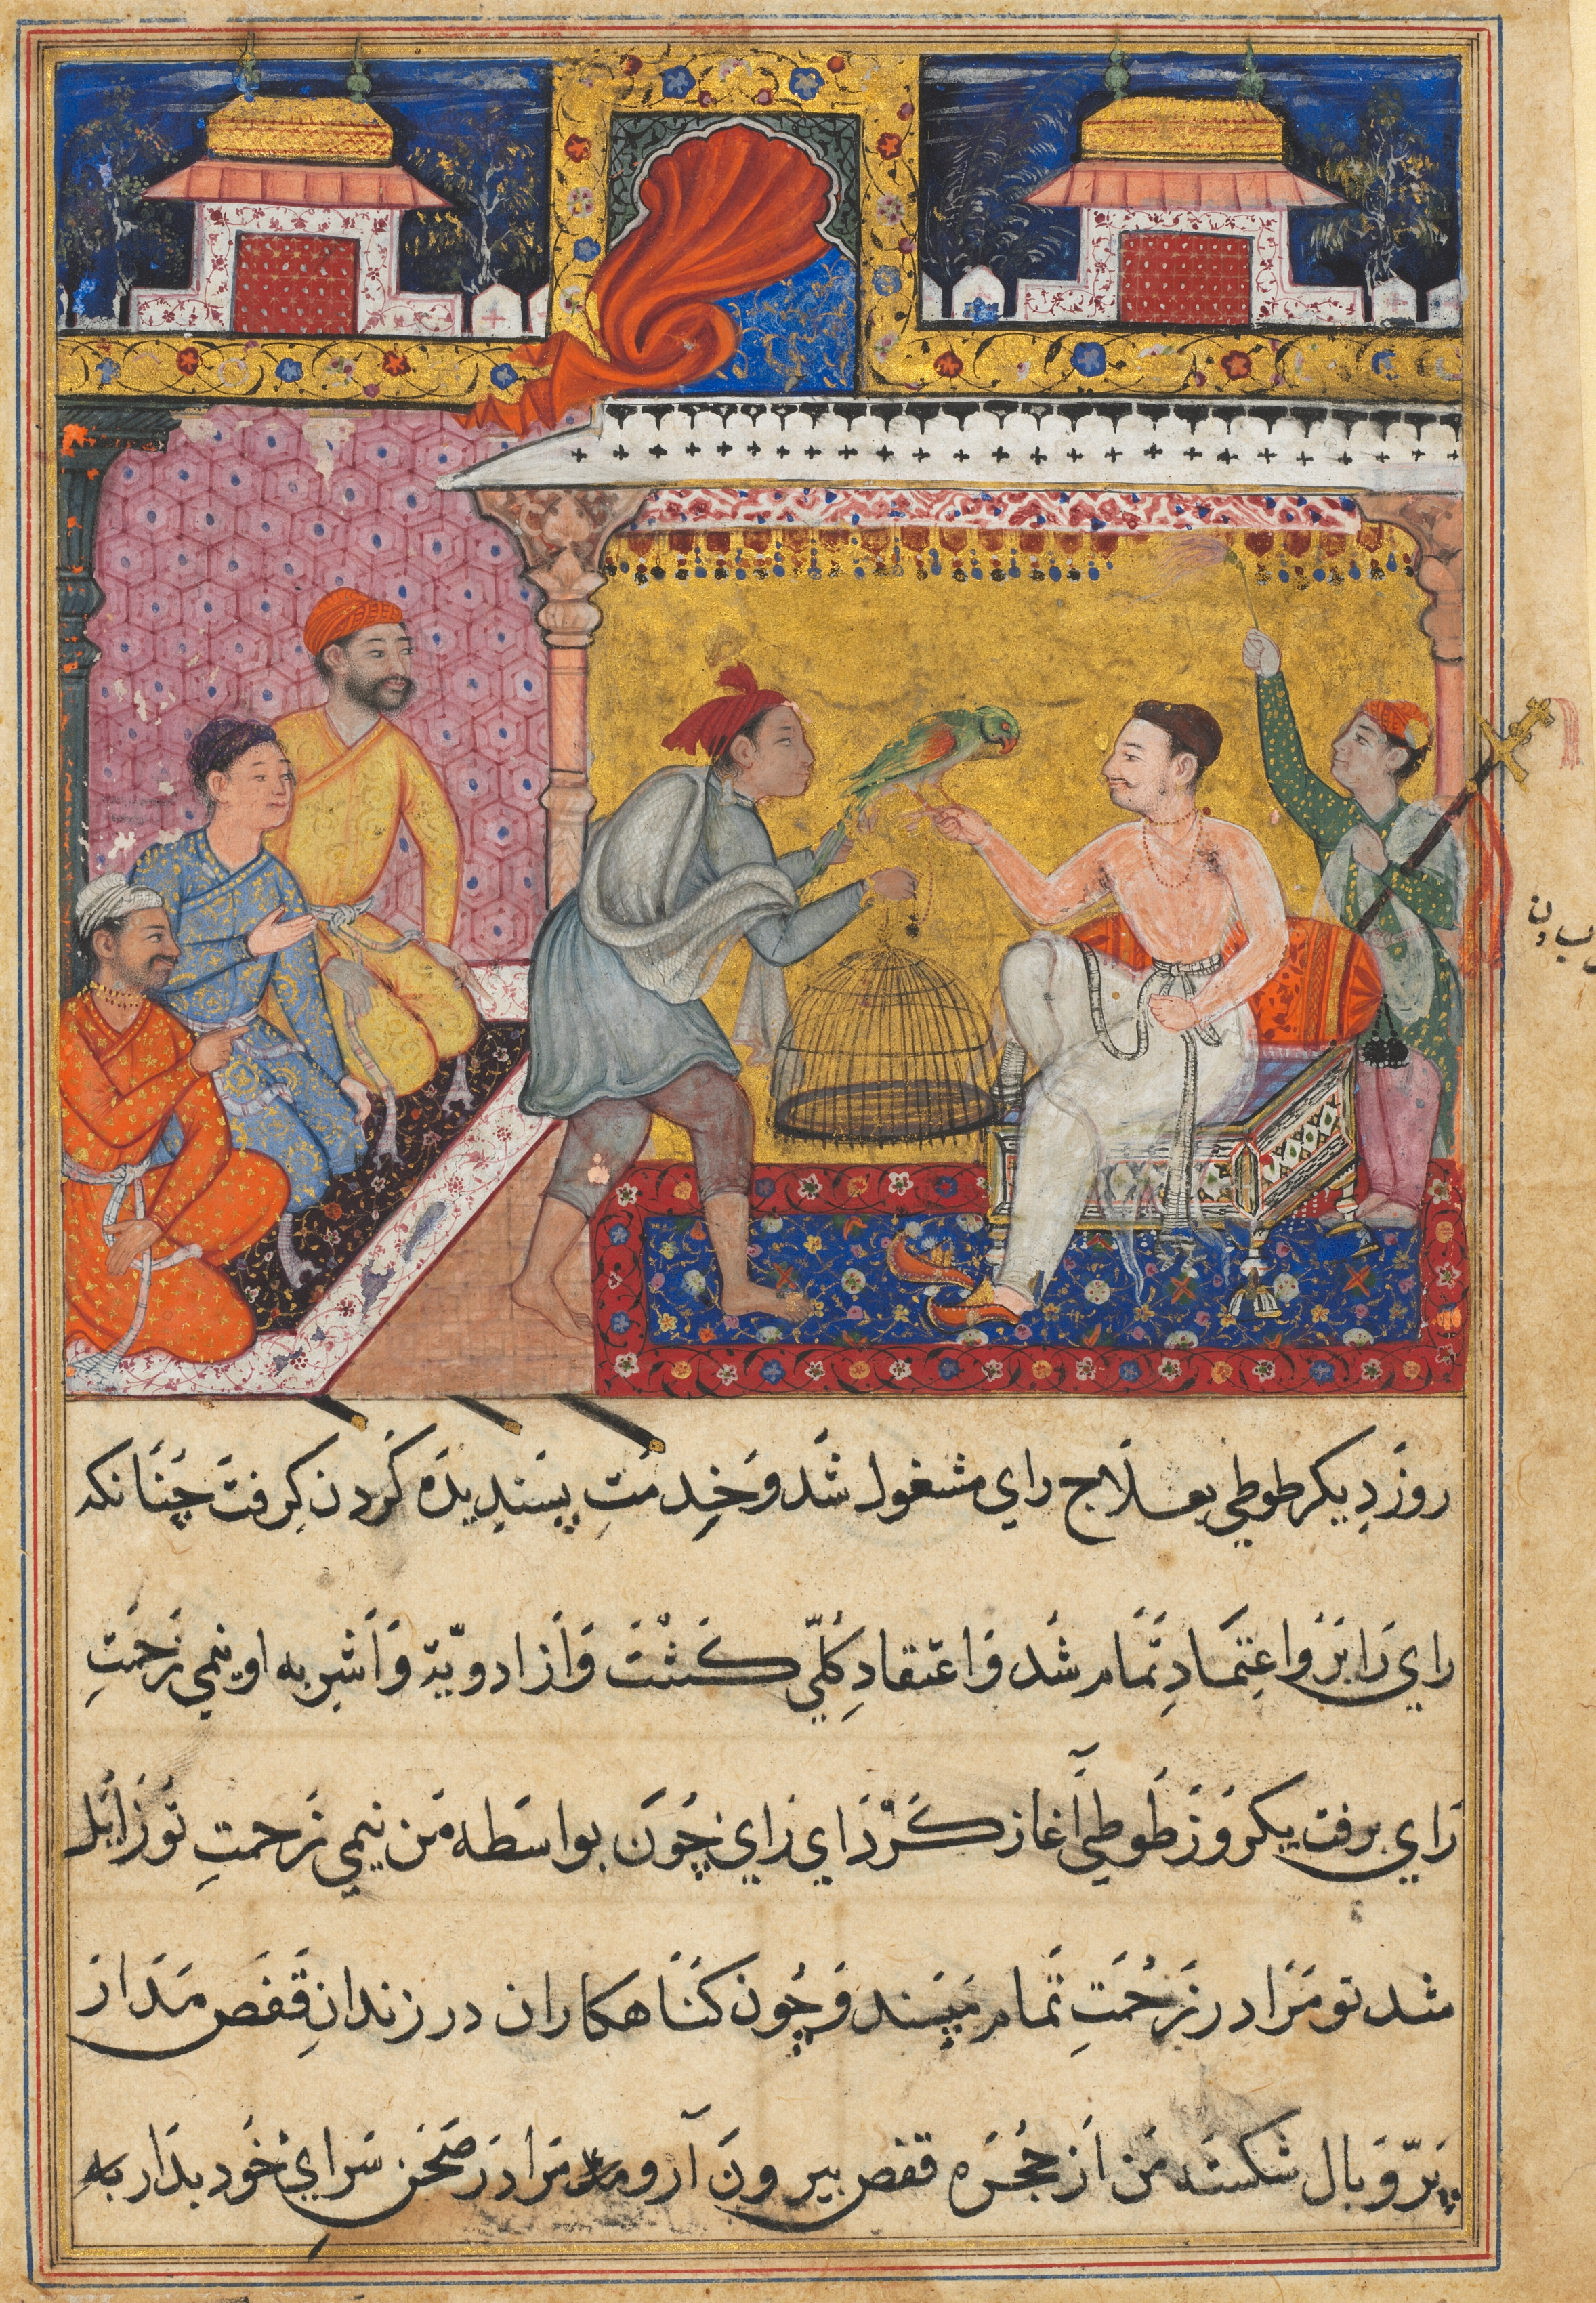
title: Page from Tales of a Parrot (Tuti-nama): text page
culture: Mughal India, court of Akbar (reigned 1556–1605)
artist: attributed to Basavana (Indian, active c. 1560–1600)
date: c. 1560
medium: gum tempera, ink, and gold on paper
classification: Painting